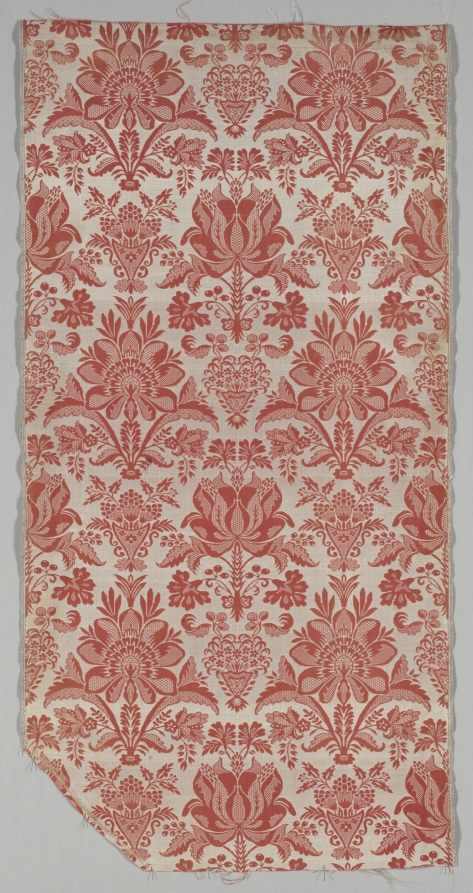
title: Length of Textile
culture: France, 18th century, Period of Louis XV (1723-1774)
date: mid 1700s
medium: lampas weave, silk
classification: Textile